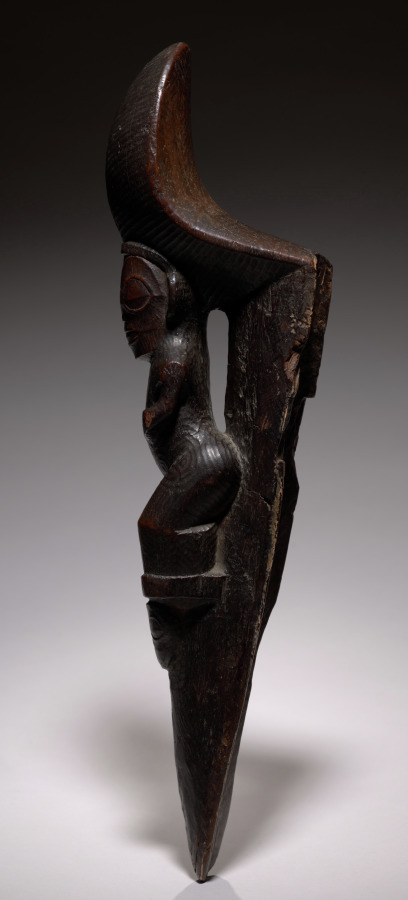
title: Stilt Footrest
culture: Polynesia, Marquesas Islands, 19th century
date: early 1800s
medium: wood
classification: Sculpture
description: Stilt walking and knockdown stilt contests were favorite forms of amusement and competition on the Marquesas Islands. The decorated footrest was secured to a six-foot stilt pole by wrapping sennit fiber cord through a wide slit at the carved figure's back and around the pointed end. Champion stilt walkers competed with those from other tribes during great festivals. Special artists carved the footrests from hardwood and cured them in the mud of a taro patch.